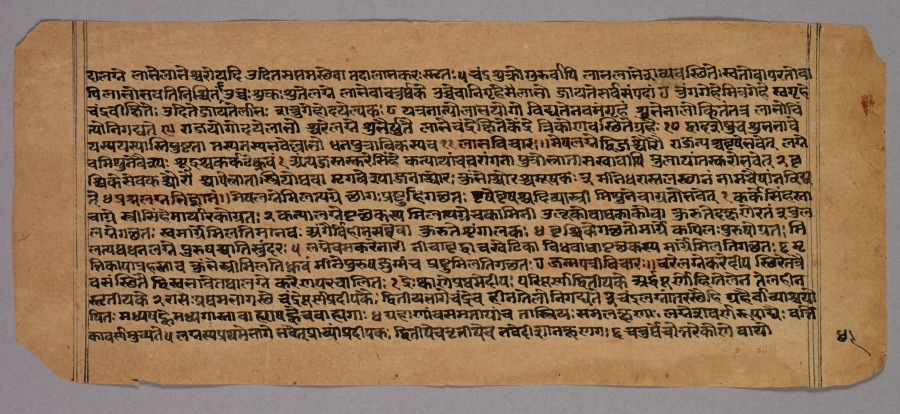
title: Page from the Prasnapradipa, a Hindu Astrology Text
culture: Western India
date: 1500s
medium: ink on paper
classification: Manuscript